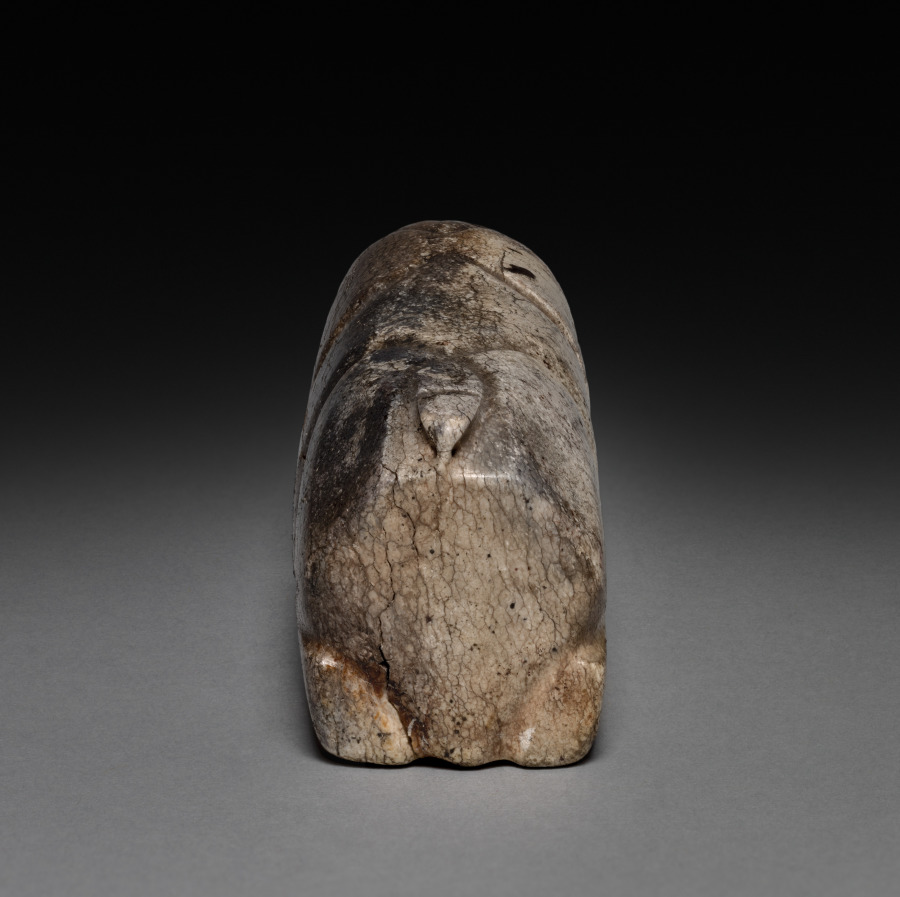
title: Pig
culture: China, Zhou dynasty (c. 1046–256 BCE)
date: 1045–256 BCE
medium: jade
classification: Jade